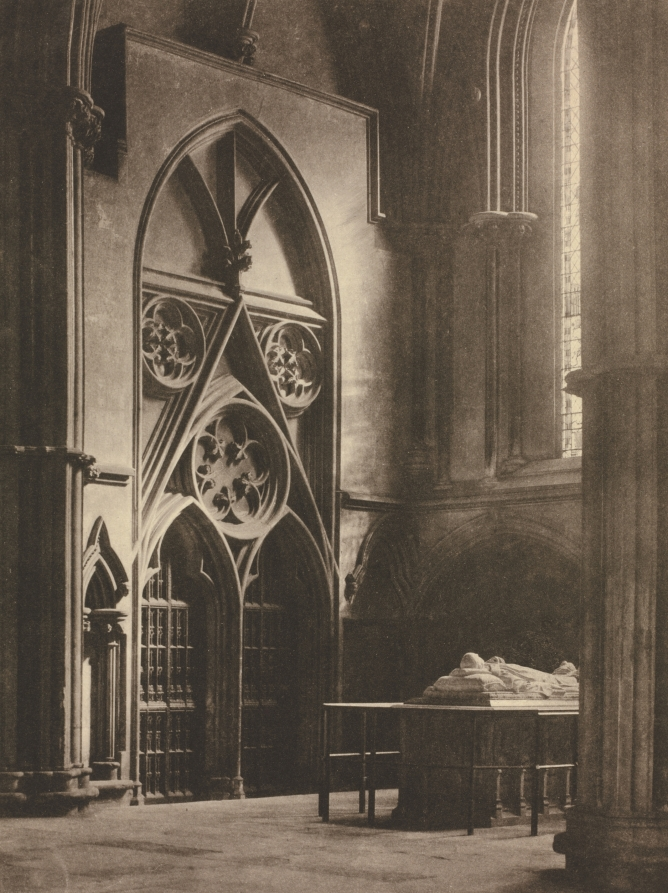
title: Camera Work: York Minister: "In Sure and Certain Hope"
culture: England, 20th century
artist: Frederick H. Evans (British, 1853–1943)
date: 1903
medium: photogravure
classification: Bound Volume